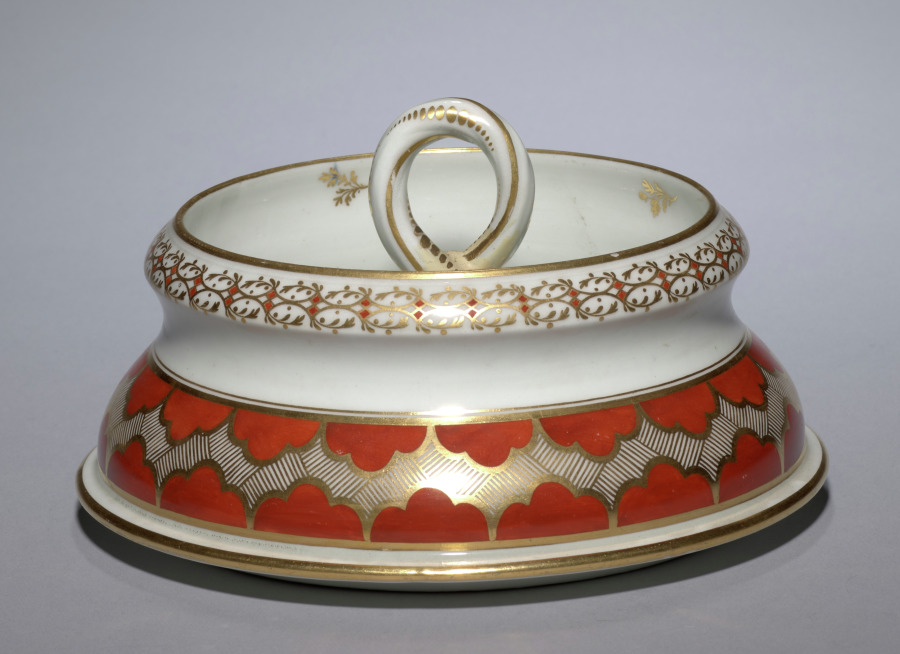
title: Cover for an Ice Pail (2 of 2)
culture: England, late 18th-early 19th Century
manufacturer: Flight & Barr (British)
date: c. 1792–1804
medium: porcelain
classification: Ceramic